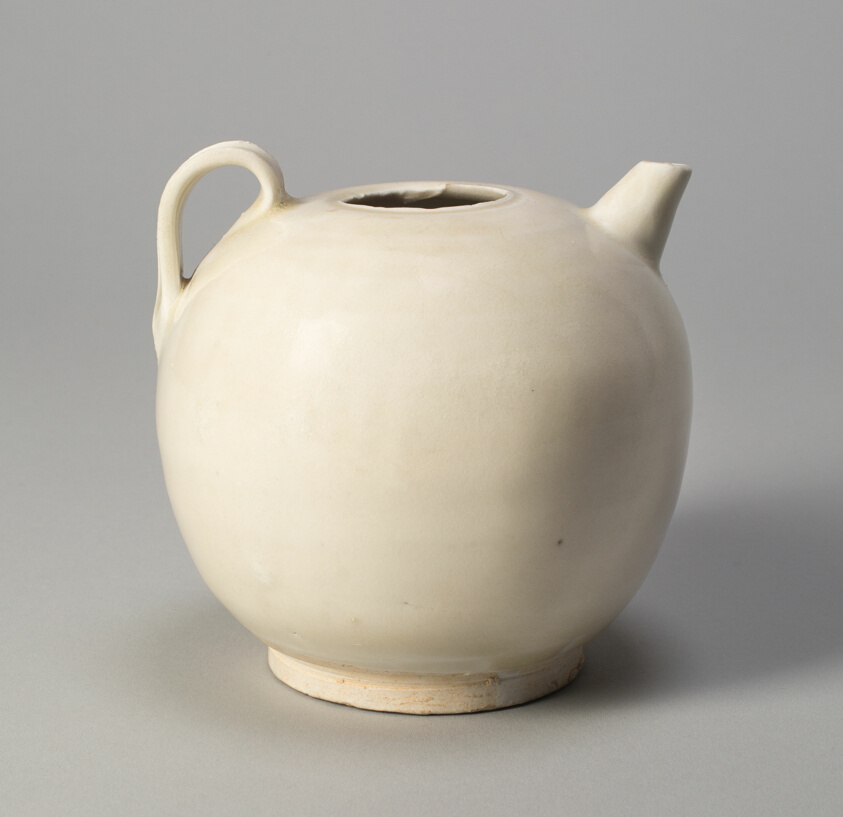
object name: Vessel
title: Ovoid Ewer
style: Chinese (culture or style)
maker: China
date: Five Dynasties period (907–960) or Northern Song dynasty (960–1127), late 10th / early 11th century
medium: Ding ware; glazed porcelain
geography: China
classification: ewer (vessel); vessel; asian art; ceramics